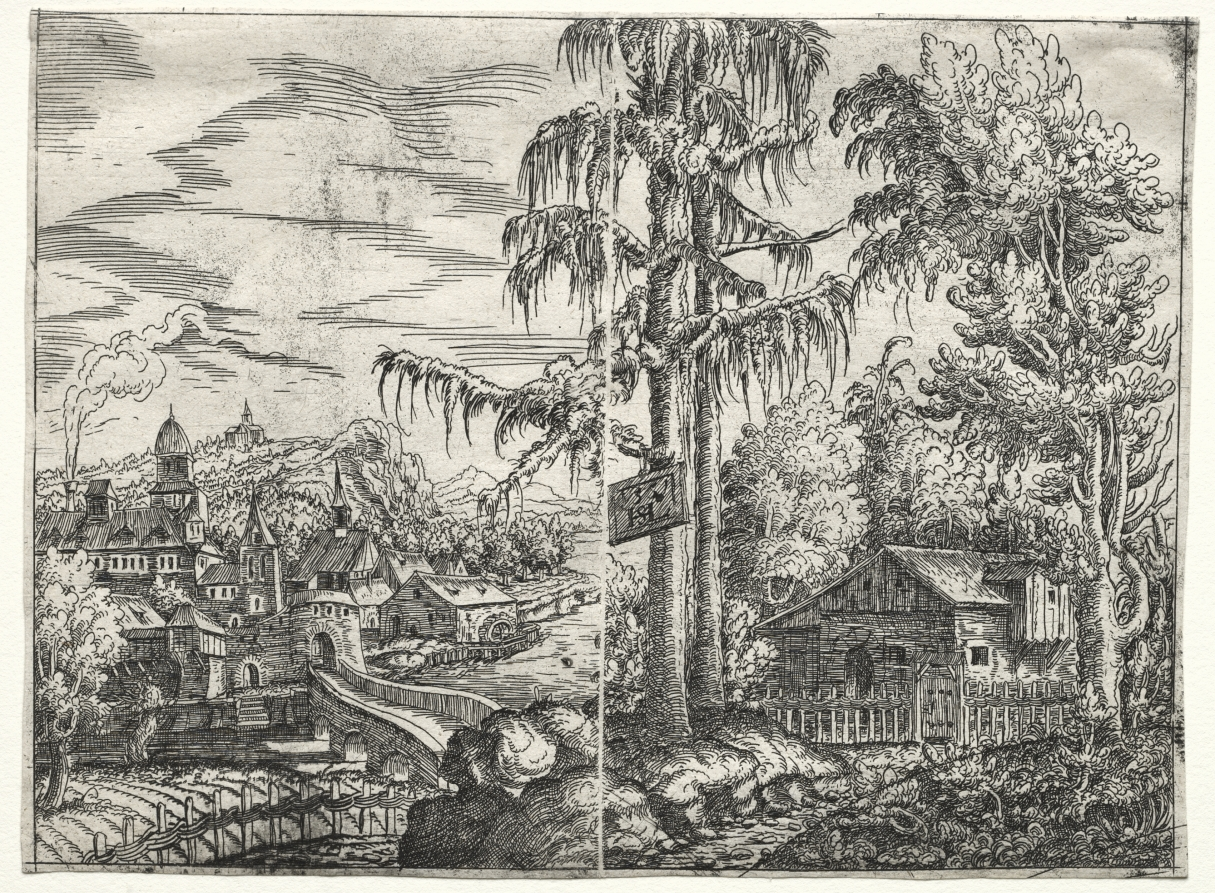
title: Landscape with the Town on a River and the Cottage between Trees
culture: Germany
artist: Hanns Lautensack (German, 1524–1566)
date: 1551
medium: etching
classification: Print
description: In this work, Hanns Lautensack used two etching plates and printed them side by side on one sheet of paper, though the reason for this is not clear. The print also displays a printing error, namely the presence of “foul biting,” small dots in the sky that indicate failure of the acid-resistant ground. Such mistakes, or experimentations, were not unusual in the early decades of the development of the etching medium, when artists were still refining their formulas and procedures. Happily, perhaps, the errors abide well with the naturalistic landscape scene.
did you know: The vertical break in the center of this composition indicates where two different plates were used and then printed together on the same sheet of paper.